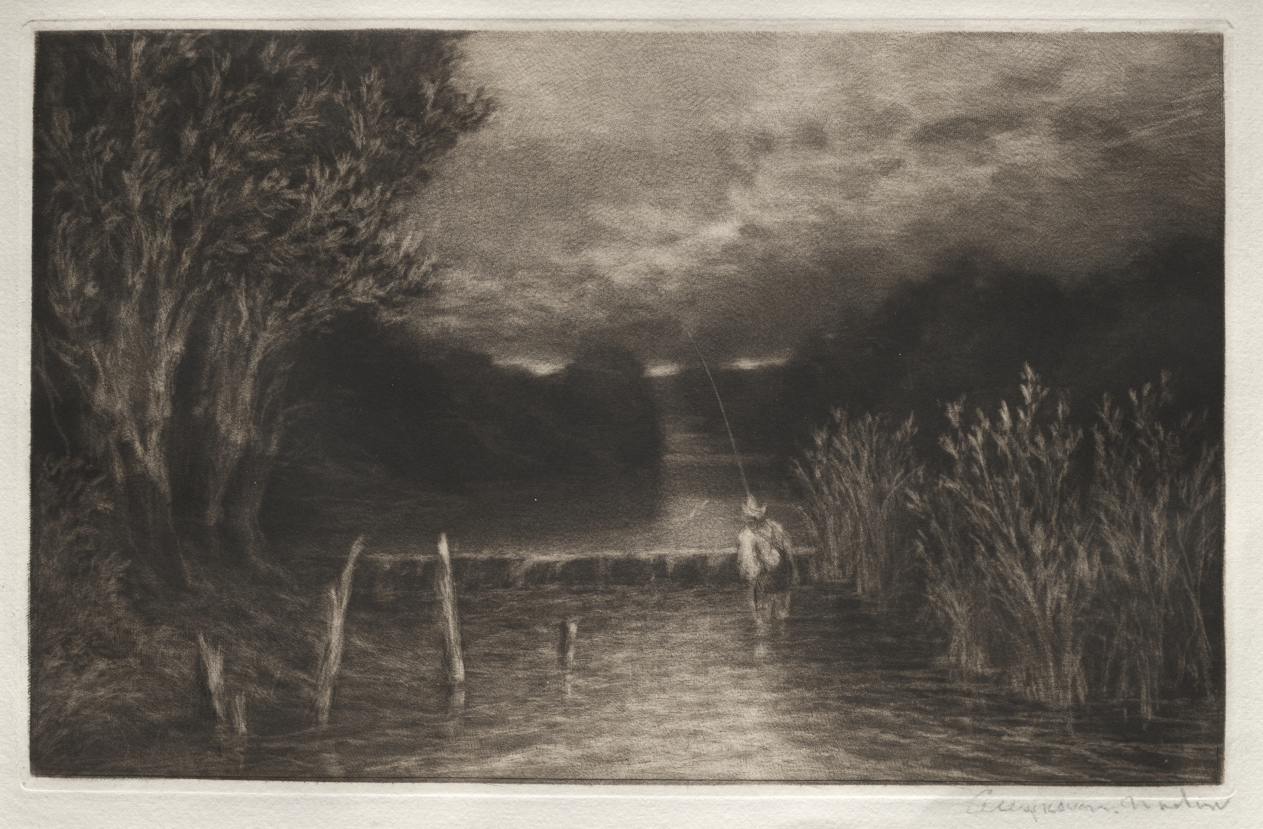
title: Grayling Fishing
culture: England, 19th century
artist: Francis Seymour Haden (British, 1818–1910)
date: 1897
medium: mezzotint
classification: Print